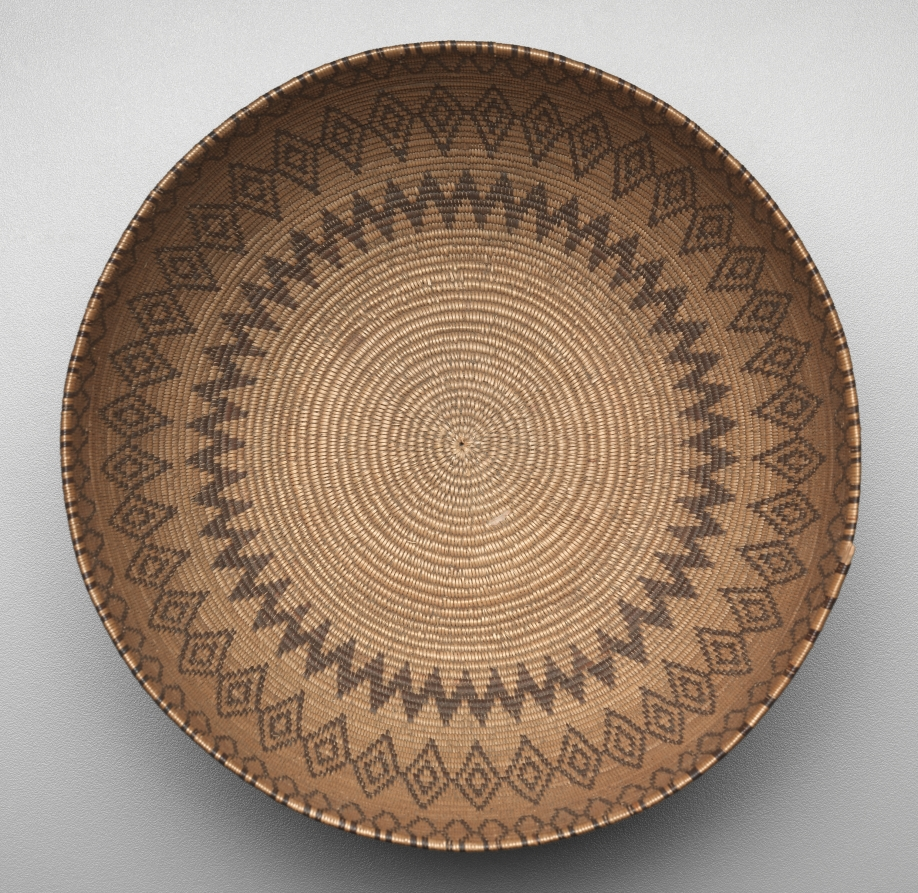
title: Bowl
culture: Great Basin, Timbisha Shoshone (Panamint)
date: 1900–1905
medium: sumac, bulrush; coiled (3 rods)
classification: Basketry